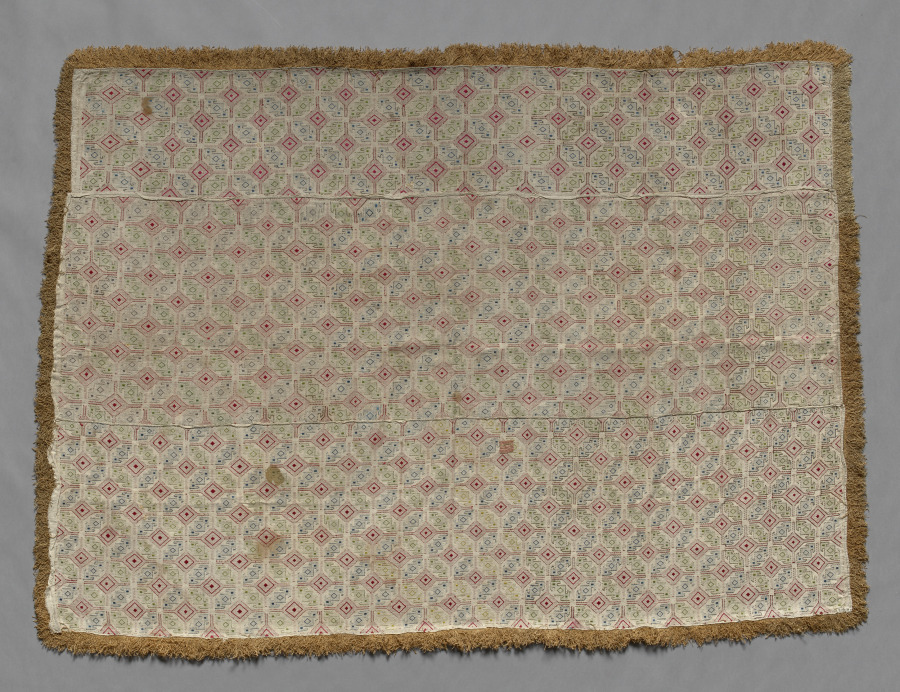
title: Bedspread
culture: Greece, Cyclades Islands, Naxos, 19th century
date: 1800s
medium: embroidery: silk on linen tabby ground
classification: Embroidery